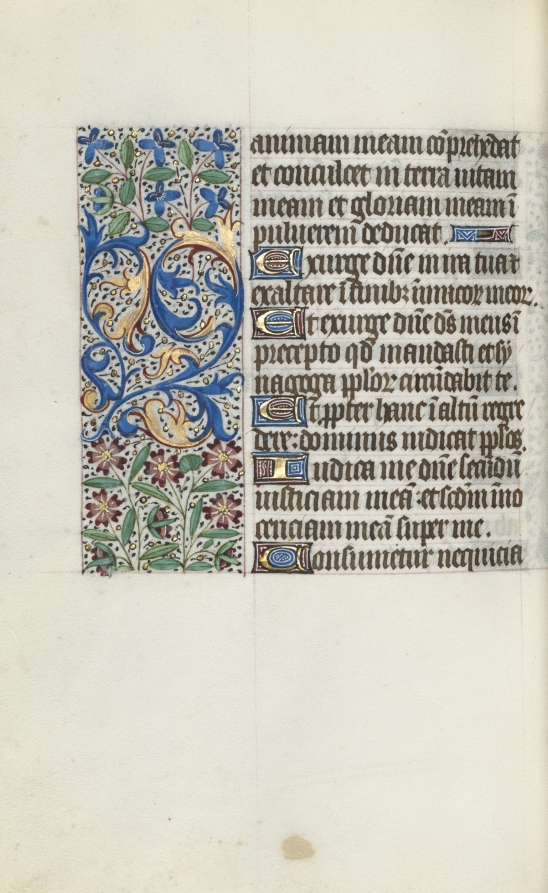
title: Book of Hours (Use of Rouen): fol. 113v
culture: France, Rouen, 15th century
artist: Master of the Geneva Latini (French, active Rouen, 1460–80)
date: c. 1470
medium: ink, tempera, and gold on vellum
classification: Bound Volume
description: In the late 1400s and early 1500s Rouen was an established and important center of book production. The city’s cathedral had a wealthy chapter that spent large sums of money to commission books and to maintain its extensive library. The stationers and booksellers would have likely been concentrated in or near the cathedral precinct. This artist, named after a manuscript now in Geneva, was Rouen’s principal illuminator during the second half of the 1400s.